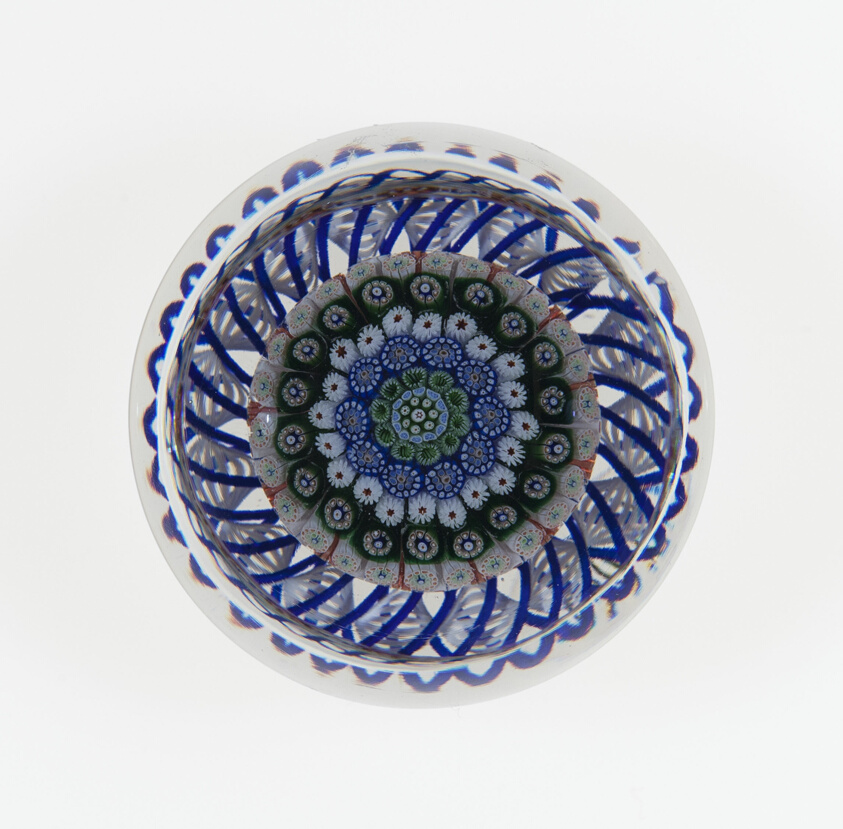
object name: Glass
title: Paperweight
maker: Saint-Louis Glassworks (Cristalleries de Saint-Louis); Lorraine, France, founded 1586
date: c. 1845–55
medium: Glass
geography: Saint-Louis-lès-Bitche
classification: paperweight; millefiori; european decorative arts; glass